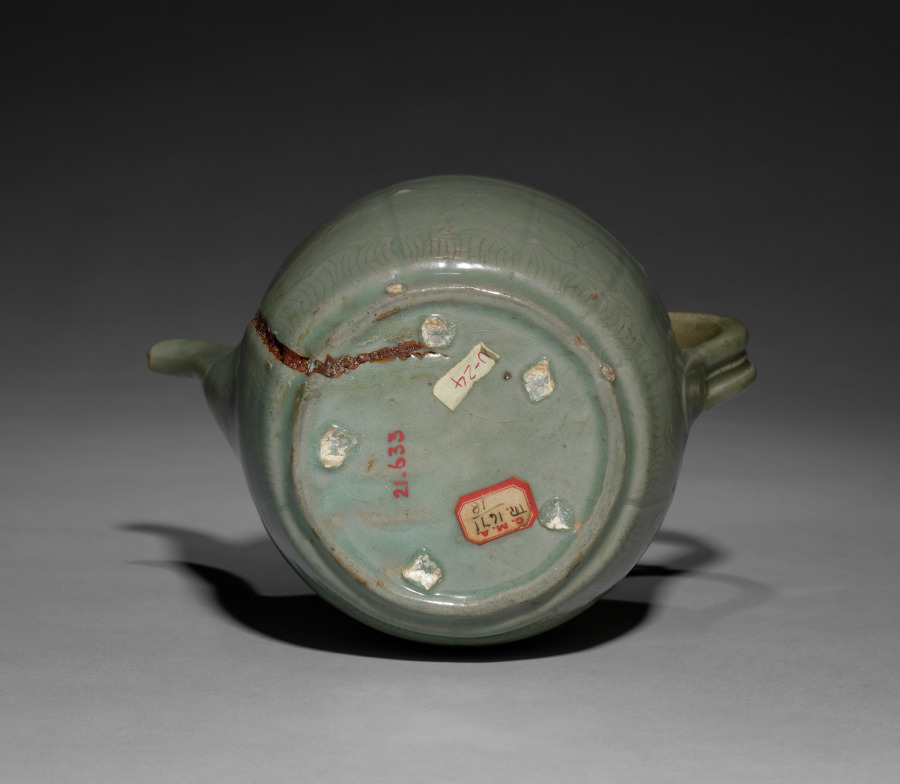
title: Wine Pot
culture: Korea, Goryeo dynasty (918–1392)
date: 918–1392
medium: pottery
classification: Ceramic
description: As early as the seventh century, the practice of drinking tea and wine became an important part of elite culture in Korea. Elites of the Goryeo period commissioned a variety of types of utensils and vessels including this elegant wine pot, not only to make their drinking experience more exciting, but also to show their appreciation of nature.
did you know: A chain or cord once connected a small loop on the handle and the lid to serve beverages without spilling.